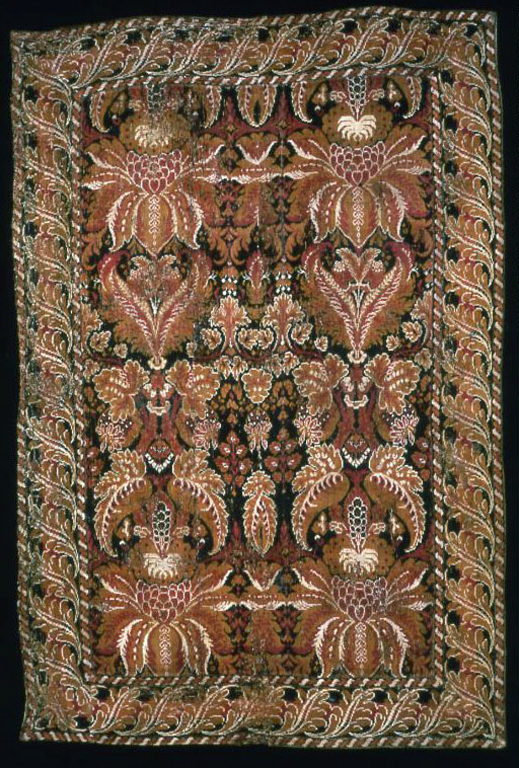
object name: Textile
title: Carpet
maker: France or the Low Countries (Netherlands, Belgium, and Luxembourg)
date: 1675/1700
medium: Linen and wool, plain weave with groups of three supplementary pile warps forming "three-color velvet;"lined with cotton, twill weave; pieced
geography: France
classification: textile; weaving - carpet